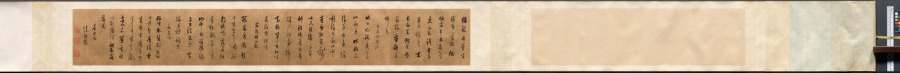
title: Four Poems: Calligraphy in Cursive Script (xingshu)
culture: China, Ming dynasty (1368–1644)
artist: Chen Jiru (Chinese, 1558–1639)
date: 1500s-1600s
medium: handscroll; ink on gold speckled paper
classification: Calligraphy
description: Written in graceful calligraphy with well-composed characters, the artist communicates his thoughts and state of mind in four poems. Characters written in dark, thick strokes convey rhythm, and indicate the moment after the writer had paused to recharge his brush with ink. Chen Jiru was a native of Huating (modern Shanghai). His calligraphy style resembles that of his friend, influential calligrapher Dong Qichang (1555–1636). Unlike Dong, Chen did not pursue government service: he burned his Confucian robes, declined a summons to serve at court, and immersed himself in literature, calligraphy, and painting.